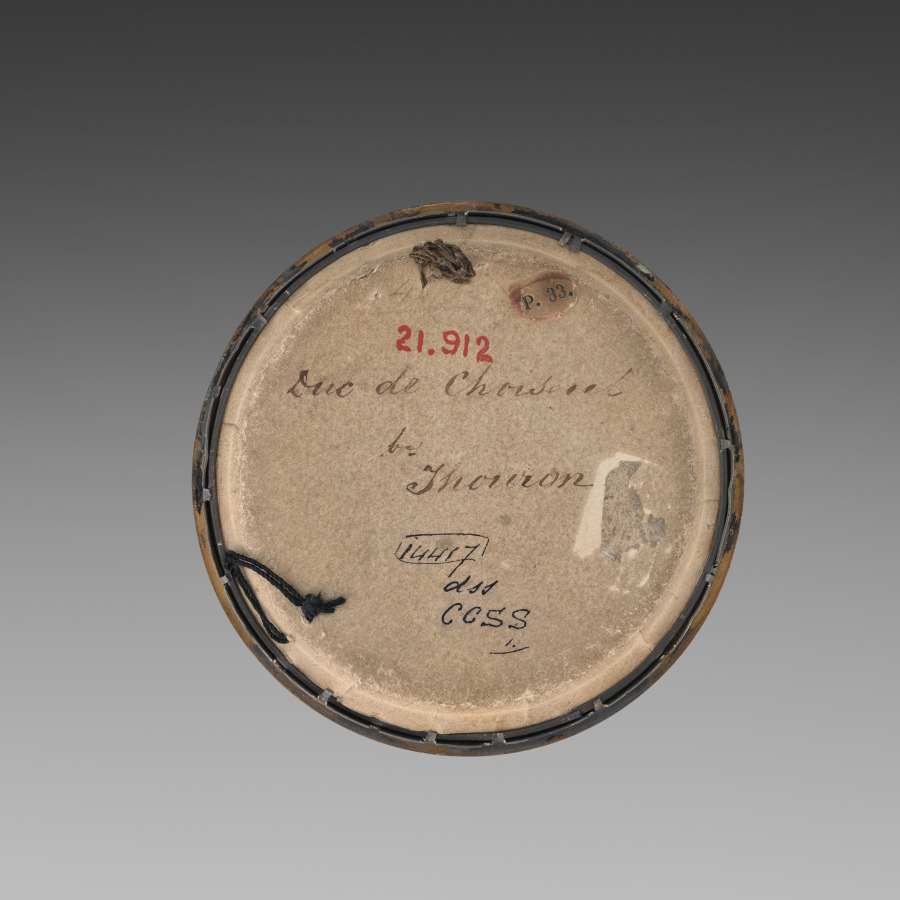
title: Portrait of Étienne François, comte de Stainville, duc de Choiseul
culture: Switzerland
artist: Jacques Thouron (Swiss, 1740–1789)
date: mid to late 1700s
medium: enamel in a gilt metal and enamel frame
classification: Portrait Miniature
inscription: signed right: Thouron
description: Unlike fragile portrait miniatures painted in watercolor on vellum or ivory, which are prone to cracking, fading, and flaking, enamels are resilient, impervious to the effects of light, and retain their striking original colors over time. Partly for this reason enamel was considered ideal for reproducing famous paintings and treasured portraits in a reduced and luminous form. The complicated and labor-intensive process of enameling required the artist to fire numerous layers of colored metal oxide at different temperatures. This process made it difficult to produce a faithful portrait likeness, though masters of the medium like Jacques Thouron were able create portraits of remarkable subtlety imbued with the sitter's personality.